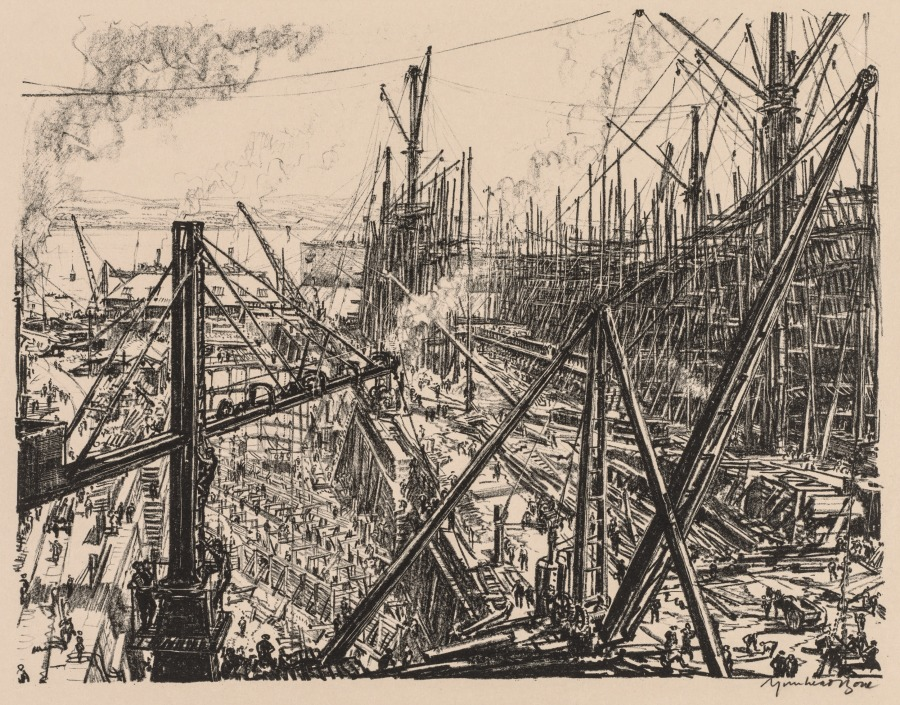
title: On the Clyde, 1917-1918: Reconstructing a Clyde Shipyard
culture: England, 20th century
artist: Muirhead Bone (British, 1876–1953)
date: 1917–1918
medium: lithograph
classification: Print